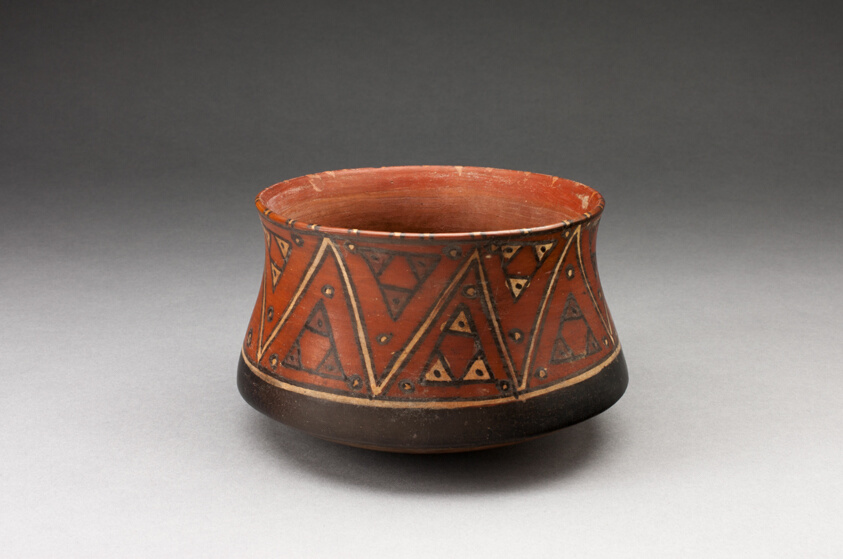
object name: Vessel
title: MIiniature Bowl with Geometric Textile-like Pattern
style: ica, late intermediate period, Pre-Columbian, americas, Arts of the Americas, andean, andes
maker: Inca (South coast or southern highlands, Peru)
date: 1450–1532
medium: Ceramic and pigment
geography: Southern Peru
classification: bowl; earthenware; ceramics; vessel; art of the americas